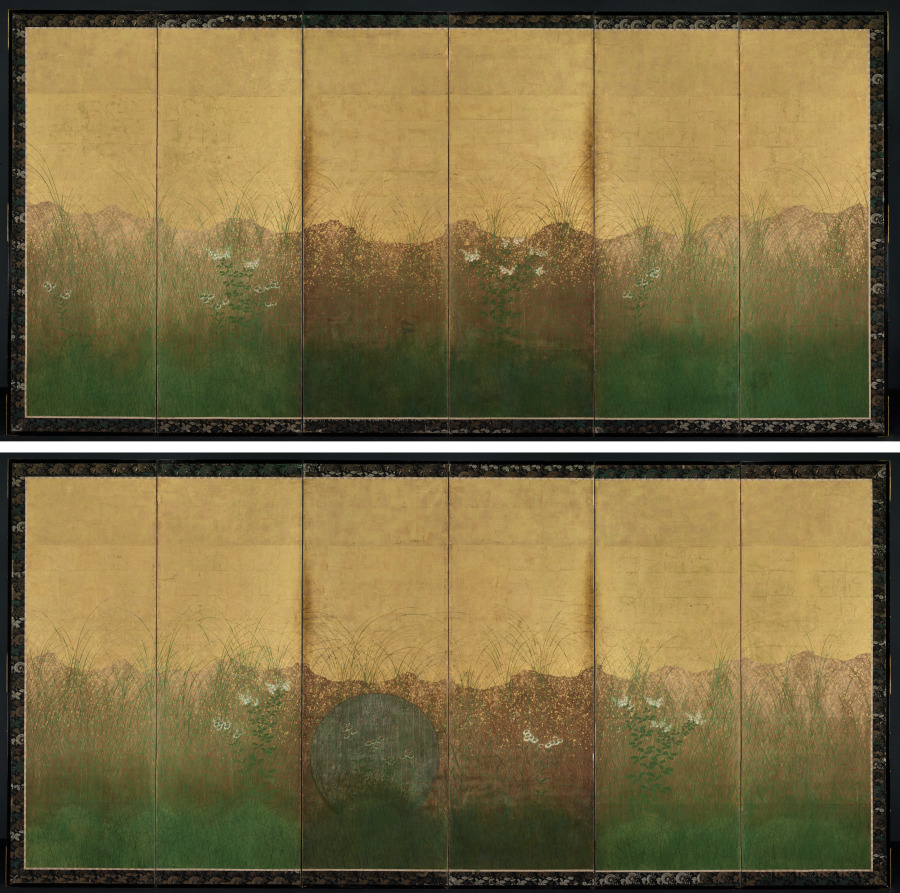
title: Autumn Evening with Full Moon on Musashino Plain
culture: Japan, Edo period (1615–1868)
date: early 1600s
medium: Pair of six-fold screens; ink, color, and gold and silver foil on gilded paper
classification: Painting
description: Tall grasses and autumn flowers reach out of thick green undergrowth in this depiction of the plain of Musashi, a site famous from classical Japanese poetry. A silver disc, now tarnished, represents the full moon. Flecks of cut-gold foil in the sky evoke the day’s passage into night. Once a wilderness with a vast horizon, Musashi is now densely populated.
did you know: The Musashino Plain is home to much of western Tokyo today.